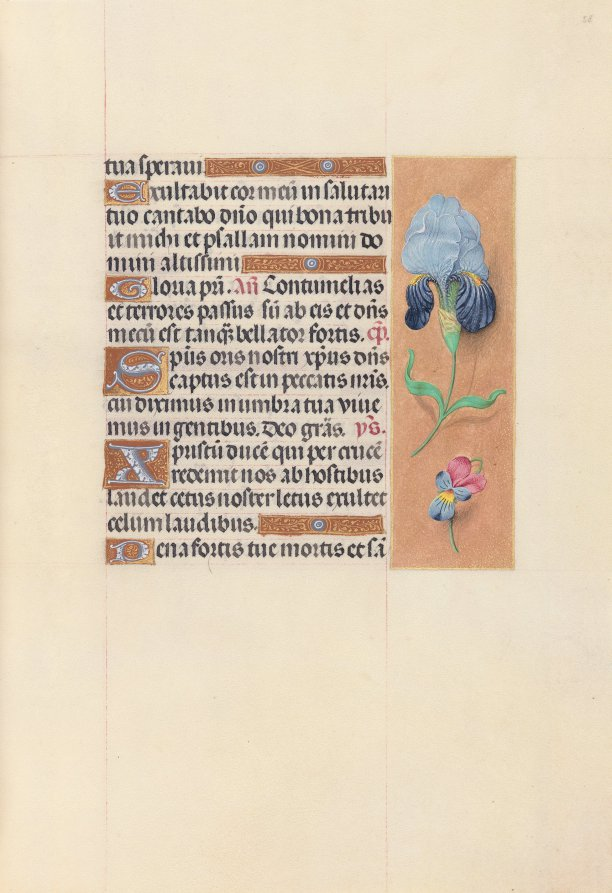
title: Hours of Queen Isabella the Catholic, Queen of Spain: Fol. 58r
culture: Flanders, Ghent and Bruges, late 15th century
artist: Master of the First Prayerbook of Maximillian (Flemish, c. 1444–1519)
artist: and Associates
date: c. 1500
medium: ink, tempera, and gold on vellum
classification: Bound Volume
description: This manuscript was illuminated by a circle of at least five highly organized manuscript painters active in the Flemish cities of Ghent and Bruges. The principal illuminator was Alexander Bening, who painted the majority of the book's miniatures. Manuscripts produced by this circle of artists are renowned for the decoration of their borders, which typically feature a rich variety of realistically-painted flowers, birds, and butterflies. This prayer book, called a book of hours, was intended not for a cleric, but for the private devotions of a lay person-in this case, Isabella the Catholic, Queen of Spain (1451-1504). Isabella's coat of arms embellishes the book's frontispiece. It is unlikely that the book was commissioned by the Queen herself; rather, she probably received it as a diplomatic gift from someone courting her patronage, perhaps Cardinal Francisco Jimenez de Cisneros. A Franciscan friar, Jimenez was dependent upon Isabella for his advancement, first to the post of Queen's confessor in 1492, and then to Archbishop of Toledo in 1495.